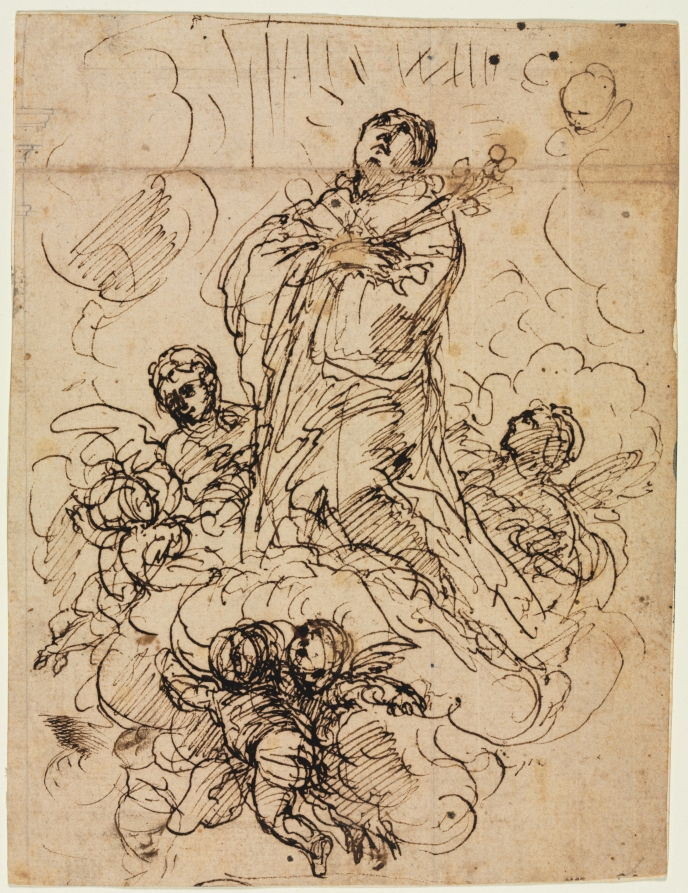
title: Apotheosis of a Saint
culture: Italy, early 18th Century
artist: attributed to Antonio Domenico Gabbiani (Italian, 1652–1726)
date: c. 1700?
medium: pen and brown ink (iron gall) with graphite (architectural element)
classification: Drawing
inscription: VERSO OF SECONDARY SUPPORT, upper left, in graphite: 6 ; upper right, in graphite: [illegible] [cropped] ; upper right, in graphite: 061779 ; upper center, in graphite: 85 / 8 [85 is underlined] ; center, in graphite: [Cavani?] ; lower center, in graphite: Pietro da Cortona ; lower left, in graphite: WL[M?] ; lower left, in graphite: 061779